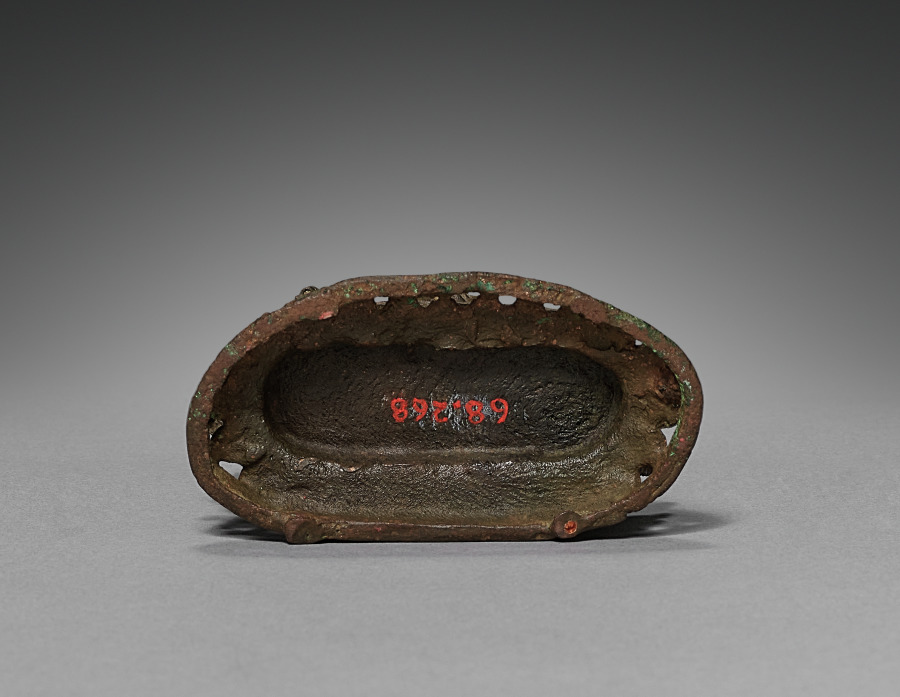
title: Durga Slaying the Demon Buffalo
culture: Nepal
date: 1500s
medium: bronze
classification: Sculpture